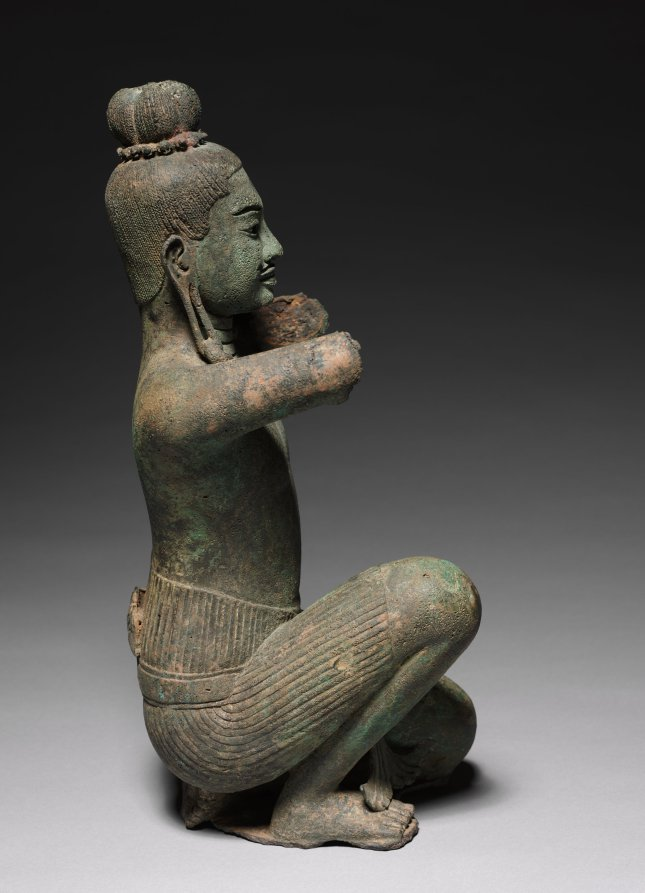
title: Kneeling Male Figure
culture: Cambodia, Angkor, Baphuon, Baphuon period, 1000s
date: 1010–80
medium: bronze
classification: Sculpture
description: The third eye in the forehead indicates that this figure identified himself with Shiva, but his kneeling stance with hands raised in a gesture of adoration indicates that he is a devotee of Shiva, who has taken on aspects of the god's physical appearance. The style of the lower garment with the low-slung belt is typical of work from the so-called Baphuon period of Khmer sculpture, like the stone standing image to the left. The eyes, eyebrows, moustache, and beard were once inlaid with silver.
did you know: This bronze figure was cast using the lost-wax (cire perdu) technique with the core armature inside.